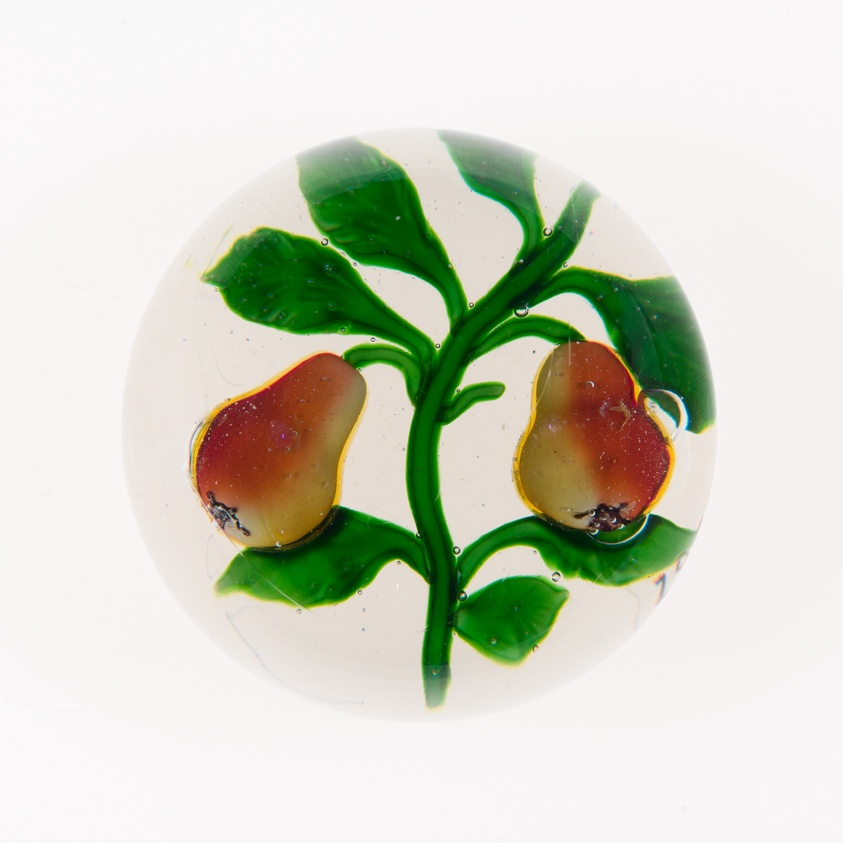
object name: Glass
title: Paperweight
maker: Saint-Louis Glassworks (Cristalleries de Saint-Louis); Lorraine, France, founded 1586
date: 19th century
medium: Glass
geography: Saint-Louis-lès-Bitche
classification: paperweight; lampwork; european decorative arts; glass